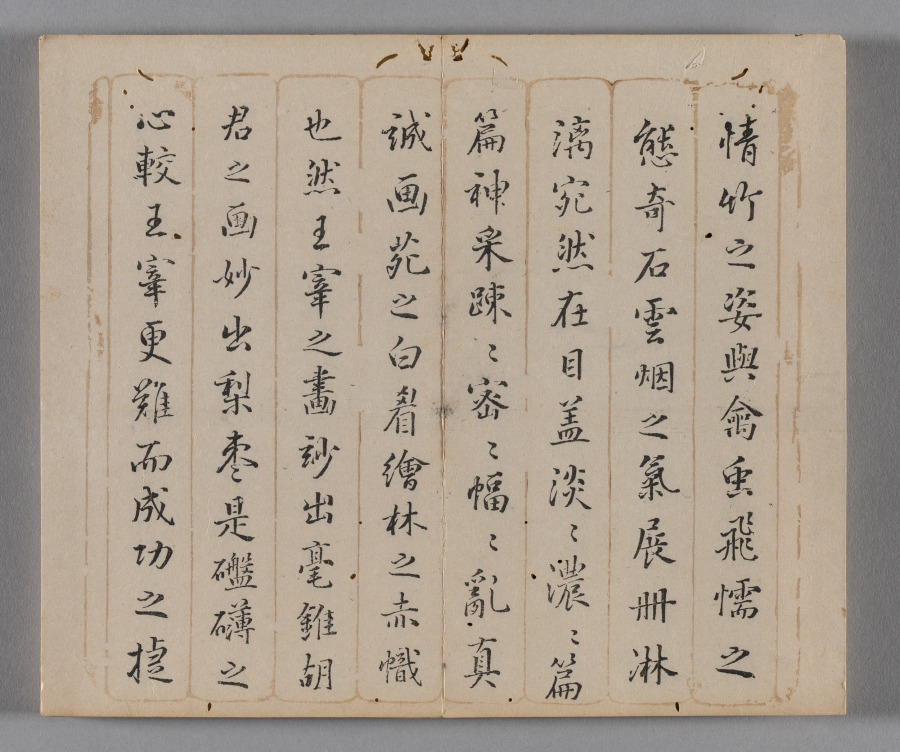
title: Ten Bamboo Studio Painting and Calligraphy Handbook (Shizhuzhai shuhua pu): Fruit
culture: China, Qing dynasty (1644-1911)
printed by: Hu Zhengyan (Chinese, c. 1584–1674)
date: 1633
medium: Woodblock-printed book; ink and colors on paper; first edition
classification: Print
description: Color printing reached a level of perfection in the early 1600s, as seen in this Ten Bamboo Studio Collection of Calligraphy and Painting and the Mustard Seed Garden Manual of Painting (printed 1679 and 1701). The painterly quality, precision in registering (aligning) the woodblocks, and harmonious colors made them the most successful color print editions in Chinese history. Both editions were printed and compiled in Nanjing, spread nationwide, and had a great impact on the arts in Japan and Korea.